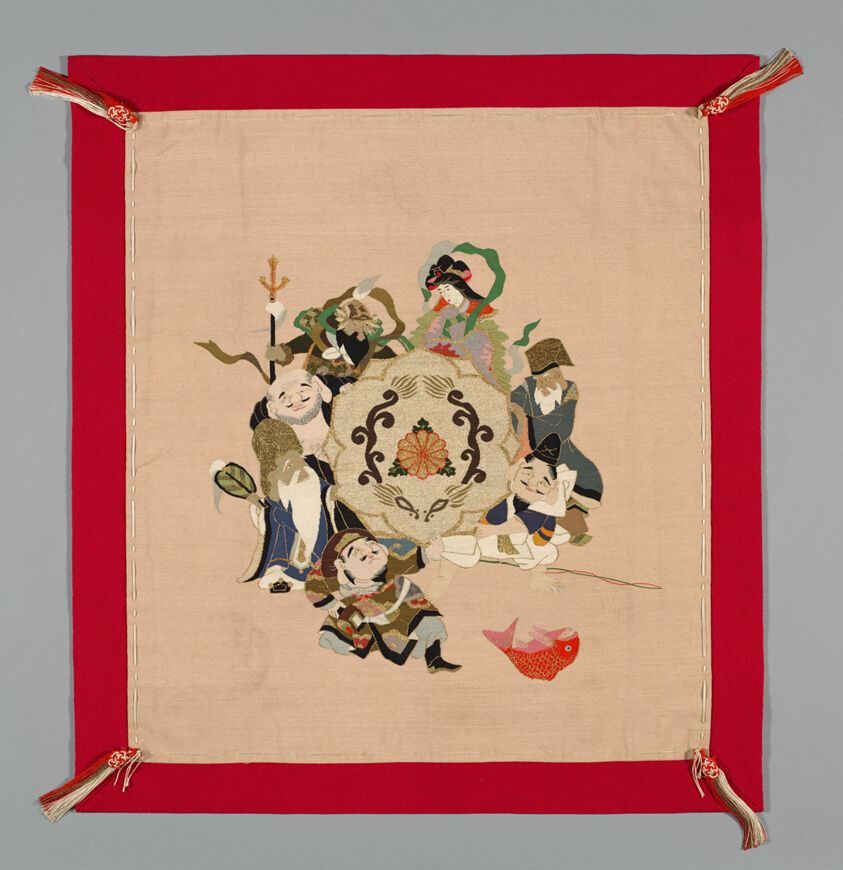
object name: Textile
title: Fukusa (Gift Cover)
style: late edo, meiji, edo (japanese period), Japanism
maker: Japan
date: late Edo period (1789–1868)/ Meiji period (1868–1912), 19th century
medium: Mon side: silk, plain weave with creped wefts (chirimen); embroidered with silk and gold-leaf-over-lacquered–paper strip wrapped cotton in laidwork and couching; patterned side: silk and gold-leaf-over-lacquered–paper strip wrapped cotton and wrapped silk, slit and single dovetailed tapestry weave (tsuzure); Sewn with lining extending beyond front equally along edges of all sides (Shihôhi); silk, running “controlling” stitches along all edges; corner: silk cords of 1:1 oblique interlacing over cotton core; 1:1 oblique interlaced over silk and gold-leaf-over-lacquered-paper strip wrapped silk replied fringe tassels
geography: Japan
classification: textile; weaving; needlework (visual works)